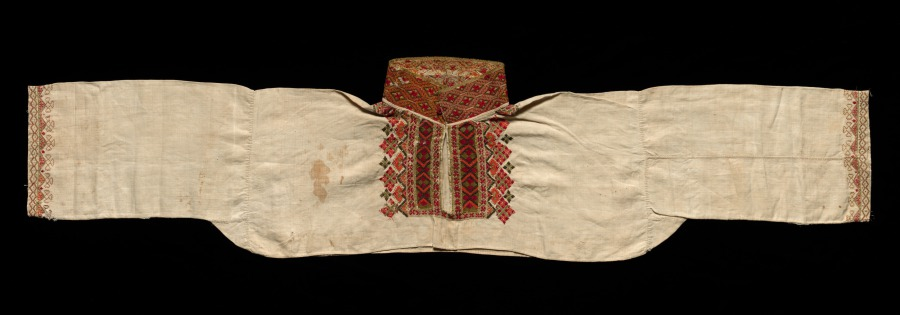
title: Peasant Blouse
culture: Norway, Hardanger, 19th century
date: 19th century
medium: plain weave linen? with embroidery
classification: Garment